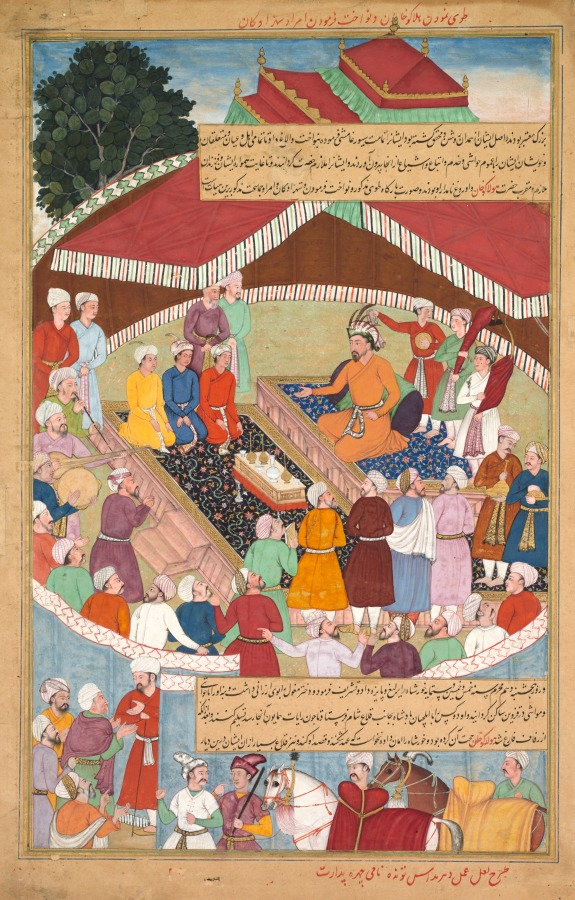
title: Hulagu Khan giving a feast and dispensing favor upon the amirs and princes, from a Chingiz-nama (Book of Chingiz Khan) of the Jami al-tavarikh (Compendium of Chronicles)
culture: Mughal India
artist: Lal (Indian, active c. 1555–1600)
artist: Dharam Das (Indian, active c. 1580–1605)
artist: Padarath (Indian, active late 1500s)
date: c. 1596–1600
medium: Gum tempera, ink, and gold on paper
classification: Painting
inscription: inscription at the base of the painting: tarih Lal 'amal-i Dharam Das tuze name cherehe Padarath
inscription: Persian inscription in top margin, in nasta‘liq script: Hulagu Khan giving a feast and dispensing favor upon the amirs and princes Persian inscription in bottom margin, in nasta‘liq script: Outline drawing by Lal, [color] work by Dharam Das, important portraits by Padarath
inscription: Verso: Text of Hulagu Khan giving a feast and dispensing favor upon the amirs and princes Persian text in nasta‘liq script: [cont. from recto] in the Land of Sham [Syria], [that] would surrender if he [Khurshah] gave the word; otherwise, it would have taken years before they could be overrun. So he [Hulagu] kept him for a while, and he was treated with respect and dignity. And then he dispatched him to the service of the Great Khan [Mongke]. And regarding his [Khurshah’s] death, there are different versions. The truth is that when news reached the Great Khan that Khurshah was on his way, he said: “Why are they bringing him [here] and tiring the packhorses to no purpose?” And he [Mongke] dispatched envoys who did away with him en route. And at this end, after Khurshah had been sent off on the road, they murdered his entire family and household on the road between Abhar and Qazvin, including men, women, and infants still in their cradles, so that not a trace of them was left. And the duration of the rule of the Ismailis in these regions is around one hundred and seventy-seven years, starting from the year four hundred and seventy-seven [AD 1084], and the word “Alamut” is its chronogram. It ended on the first of Dh’ul Qa’da 654 [20 November 1256]. And the number of their rulers is seven, in this manner and sequence: first, Hasan son of Ali son of Muhammad al-Sabbah al-Hamayri; second, Kiya Buzug Ummid, and he and Hasan [the first ruler listed] were both Ismaili missionaries; third, Muhammad Hasan Buzurg Ummid, who is known as ‘Ala dhhkirhi’l-Salam; fourth, Hasan son of Muhammad Buzurg Ummid; fifth, Muhammad Jalal al-Din son of Hasan and they call him Hasan the New Musulman; sixth, ‘Ala al-Din son of Muhammad son of al-Hasan son of Muhammad; seventh, Rukn al-Din Khurshah son of ‘Ala al-Din, in whose time the dynasty fell. And the conquest of those fortresses and edifices is finite proof of the plenitude of the good fortune of Mongke Khan and his brother Hulagu Khan, who managed to accomplish such a momentous task in such a short span of time with such ease and facility; for had it not been for that good fortune, the conquered domains would have been ruined, faced with the difficulties of providing and transporting provisions and drink. These are the events and accounts of the conquest of the lands of the Ismaili heretics, as mentioned above. Finis. The narrative of Hulagu Khan turning toward Kohistan after the capture of the heretics’ fortresses and receiving Bayju Noyan from Anatolia and his interrogation by Hulagu Khan and his dispatch again to Anatolia to complete the conquest Hulagu Khan, when he had completed the conquest of the citadels and lands of the [Ismaili] heretics, in Rabi‘ al-awwal of the year 655 [AD 1257] from the region of Qazvin, proceeded toward Hamadan. And Bayju Noyan arrived from the direction of Azerbaijan. Hulagu Khan was upset with him and shouted at him saying, “Since the passing of Churmaghun Noyan, what have you done in the Land of Iran, and which army have you defeated, and which rebel have you managed to bring into obedience, aside from instilling fear into the Mongol army with accounts of the caliph’s might and grandeur?” He [Bayju] knelt down and said: “I committed no wrong, but did what I could as presented to you. I have subjugated the land from the gates of Rayy to the borders of Anatolia and Syria, all save the matter of Baghdad. It is difficult to take the army there given the difficult roads ahead, the heavy population, and their vast army and arms. It is for the mighty ruler [padshah] to decide and I will obey whatever he decrees.” These words alleviated his [Hulagu’s] anger and he decreed thus: “You must go and conquer lands as far as the shores of the western sea from the hands of the sons of Efrins and Lanktar.” Bayju returned at once and took an army to Anatolia; and at that time the sultan of Anatolia, Ghiyath al-Din Kai-Khusrau son of ‘Ala al-Din, met Bayju Noyan in battle at Kusa Dagh and was defeated. And Bayju conquered the whole of Anatolia and indulged in plunder. And Hulagu Khan accompanied by princes Ghuli and Balagha and Tutar and chief commanders Buqa Timur and Qudusun and Qata and Sunjaq and Kuka Ilgai, camped in the Hamadan plain near Hatimabad, which is a meadow with tamarisk trees, and began to prepare and arrange the troops. Finis. The emergence of tumult in Baghdad and the discord between the chief secretary and the vizier and the beginning of the caliph of Baghdad’s demise In the year 654 [AD 1256] at the end of the summer, a great flood came down and inundated the city of Baghdad in such a way that the lower part of the buildings there were submerged in water and disappeared, and for fifty days the flood was on the rise, and then it began to subside, and half of the habitations in Iraq were destroyed, and to date the Musta‘sami Flood is remembered as a byword [for a damaging flood] among the people of Baghdad. And in the midst of this catastrophic event, the rabble, ruffians, and misfits embarked on looting and gained the upper hand and every day killed a lot of people. And Mujahid al-Din Aybek, the chief secretary, gathered the rabble and the misfits around himself and in a short space of time built up a power base, and when he felt empowered and saw that Caliph Musta‘sam was indecisive and naive in judgment, he consulted with some of the notables in order to oust him from his position and place another Abbasid in his place, and vizier . . .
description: Seated on a lapis-blue floral carpet is Chingiz (Genghis) Khan’s grandson, who ruled Iran from 1256 to 1265. This painting is from an illustrated copy of the history of Chingiz Khan and his family that the Mughal emperor Akbar commissioned toward the end of the latter’s life. Mughal is the Persian word for Mongol, and Akbar traced direct genealogical descent from Chingiz Khan on his mother’s side. The nomadic Mongols created court settings using portable platforms and elegant carpets and tents. Multilevel canopies of imperial crimson mark the position of the khan, which means “ruler” in Mongolian.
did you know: Mongol rulers were identified by the five-feathered crown.